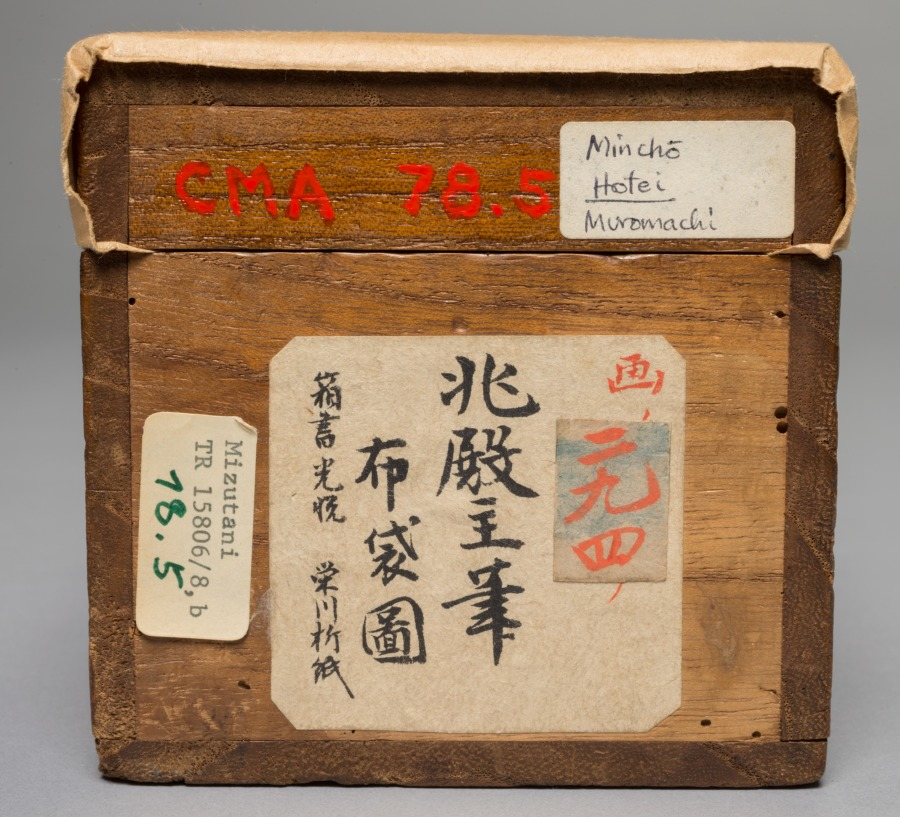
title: Hotei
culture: Japan, Muromachi period (1392–1573)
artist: Kichizan Minchō (Japanese, 1352–1431)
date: late 1300s–early 1400s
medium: hanging scroll; ink and slight color on paper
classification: Painting